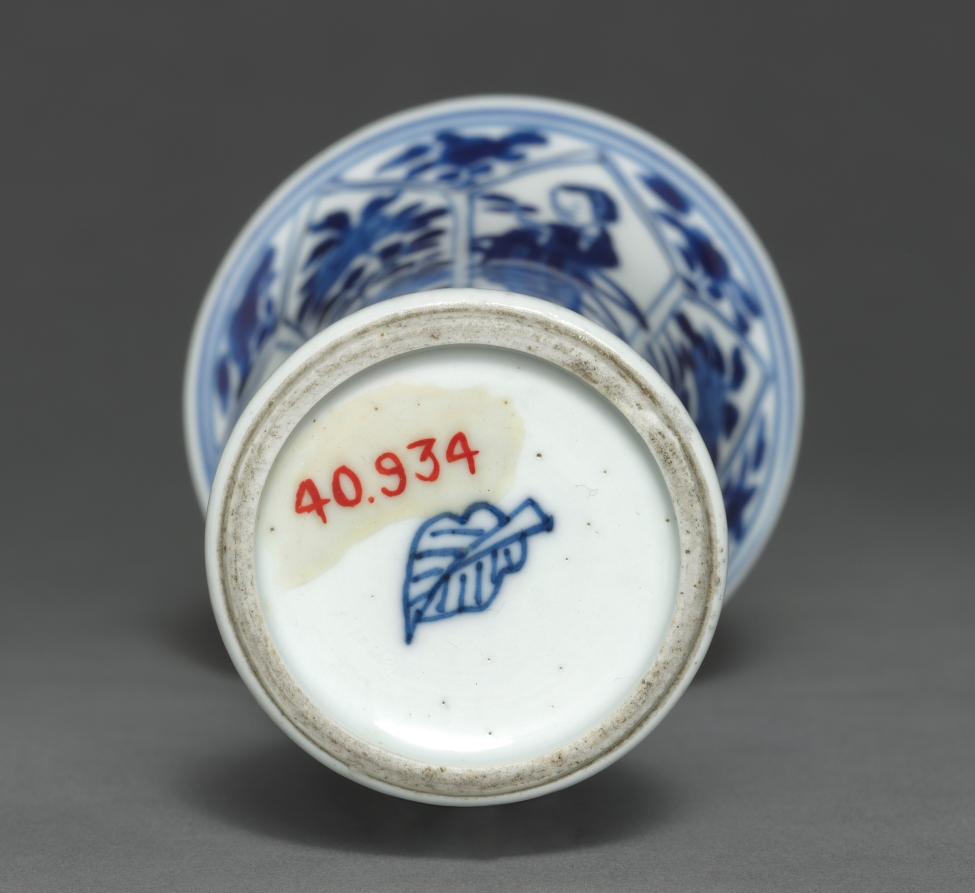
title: Beaker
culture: China, Qing dynasty (1644-1911), Daoguang reign (1821-1850) - Xianfeng reign (1851-1861)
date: 19th Century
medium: porcelain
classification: Ceramic